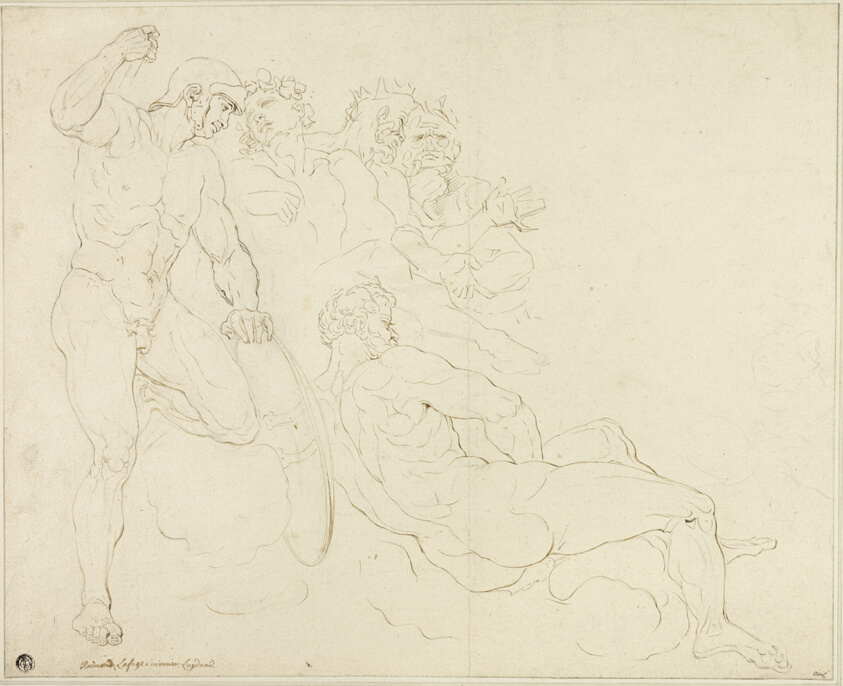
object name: Drawing and Watercolor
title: Sketches of Six Classical Figures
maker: Possibly Raymond de Lafage; French, 1656-1690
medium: Pen and brown ink, over graphite, on cream laid paper, laid down on ivory laid paper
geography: France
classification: pen and ink drawings; drawings (visual works); prints and drawing